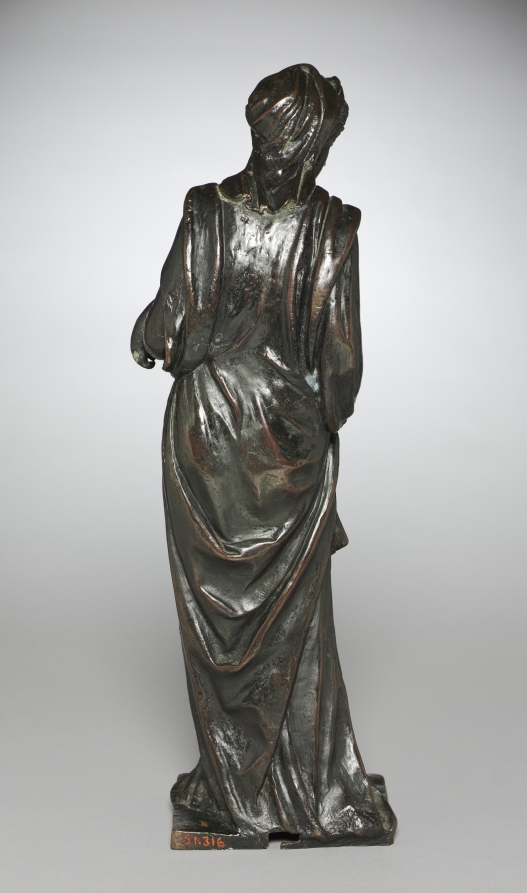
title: Virgin and Child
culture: Italy, 16th century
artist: Jacopo Sansovino (Italian, 1486–1570)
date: early 1530s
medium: bronze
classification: Sculpture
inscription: inscribed across the front of the base: IACOBVS SANSOV.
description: This statue is a scaled-down version of a marble figure the sculptor and architect Jacopo Sansovino carved for the funerary monument of a nobleman in Verona, Italy. Balancing the stable mass of the Virgin with the seemingly weightless, elongated child draped gracefully across her torso, the composition illustrates Sansovino’s skill. After training in Florence, he relocated to Rome before eventually settling in Venice in 1527. Sansovino contributed significantly to public and private projects across the region, from important civic buildings and tomb sculpture to intimately scaled bronzes, such as this example from his early Venetian period.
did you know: Sansovino's signature on the base—uncommon for bronzes of this period—marks this as a work of particular importance.